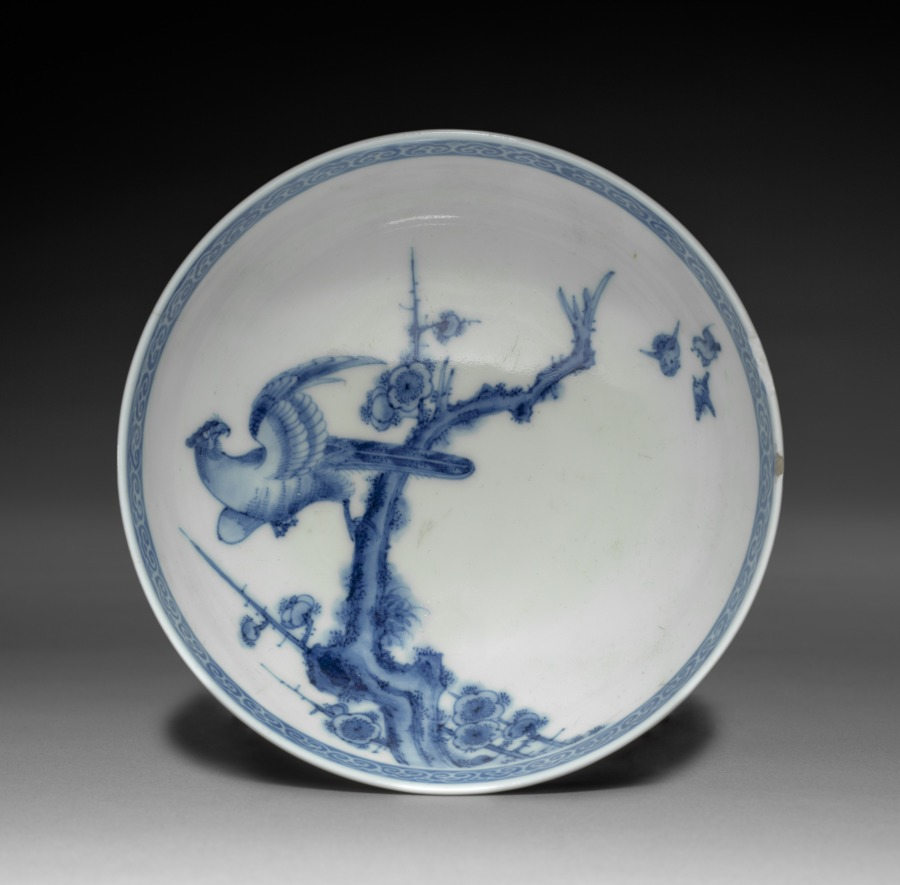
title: Dish with Hawk and Sparrows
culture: Japan, Meiji period (1868–1912) or Taishō period (1912–26)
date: c 1900– 1925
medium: Porcelain with underglaze blue decoration (Hizen ware)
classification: Ceramic